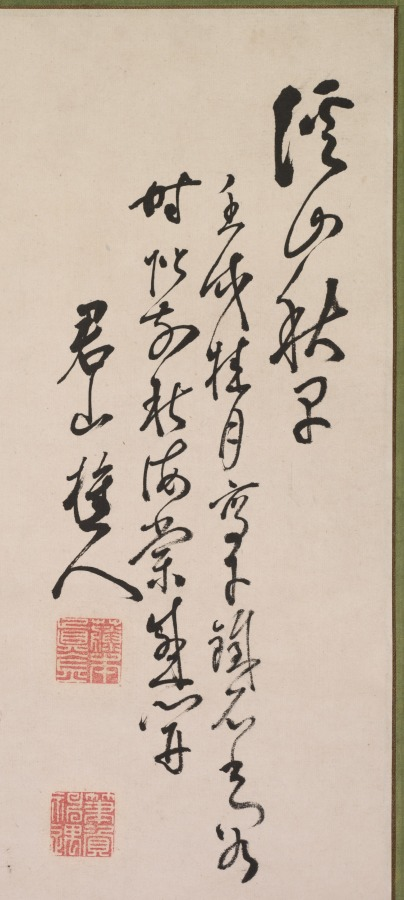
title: Landscape with Figures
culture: Japan, Edo period (1615–1868)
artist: Fujimoto Tesseki (Japanese, 1816–1863)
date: c. 1840–63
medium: hanging scroll; ink and color on paper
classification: Painting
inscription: Artist's inscription and two seals in upper right. A third seal in lower left.